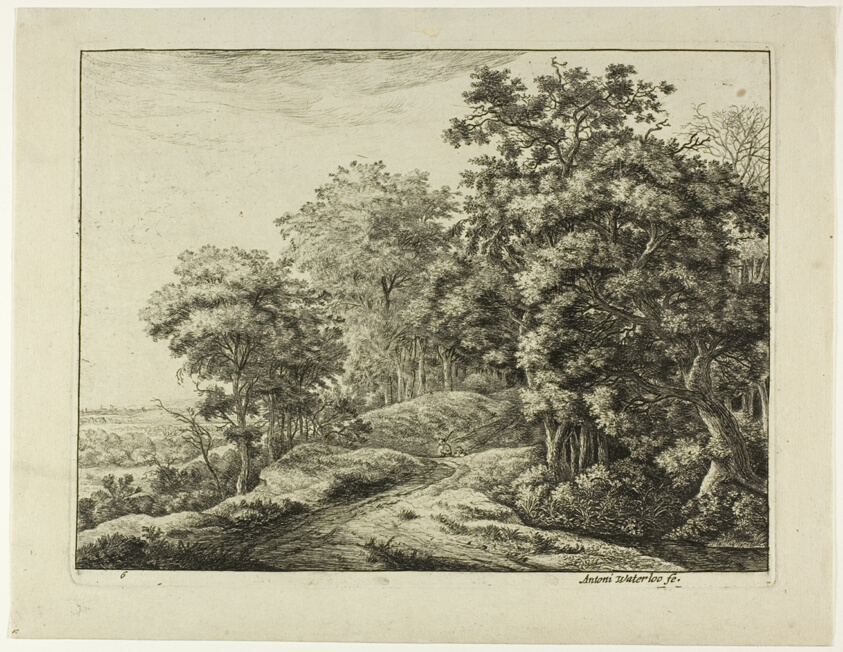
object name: Print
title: Two Men in the Hollow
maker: Anthonie Waterloo (Dutch, c. 1610-1690)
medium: Etching on paper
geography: Holland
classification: etching; print; prints and drawing